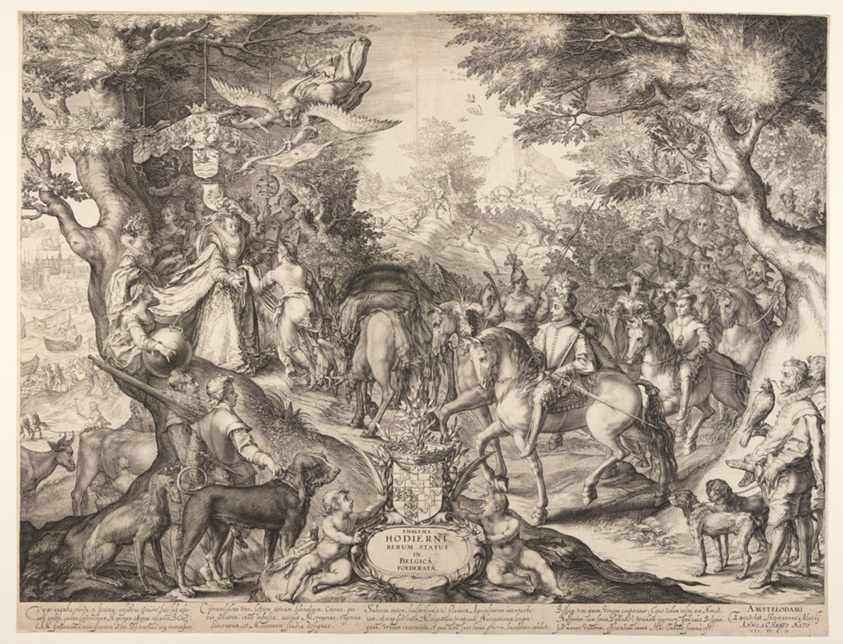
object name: Print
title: Allegory of the Flourishing State of the United Provinces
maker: Jan Saenredam (Dutch, 1565–1607)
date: 1602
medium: Engraving on ivory laid paper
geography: Netherlands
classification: engraving; paper; print; prints and drawing